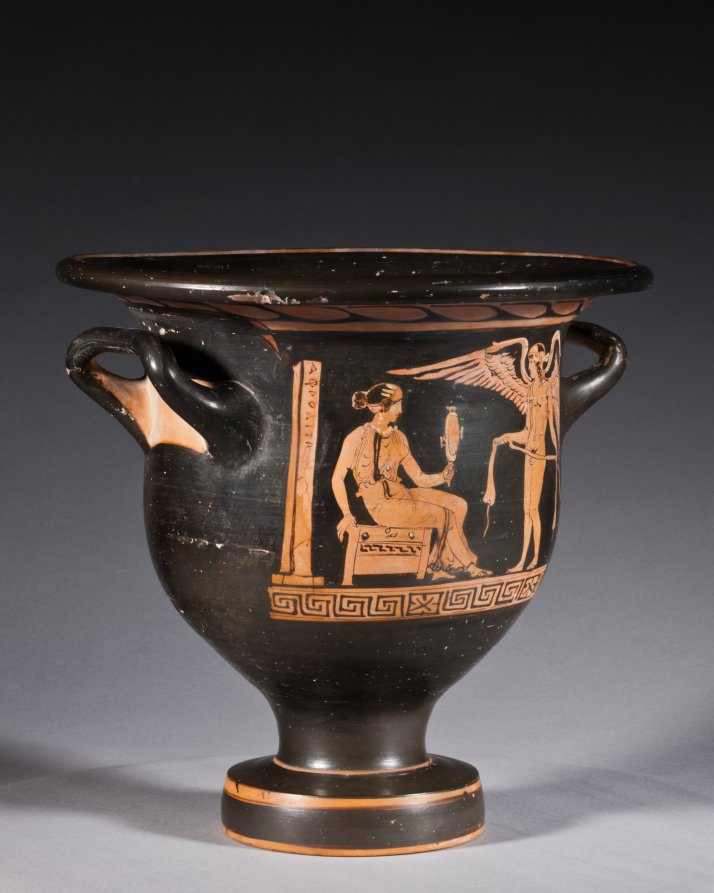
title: Red-Figure Bell Krater (Mixing Vessel): Aphrodite and Eros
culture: South Italian, Apulian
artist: attributed to Graz Painter (South Italian, Apulian, active c. 380–360 BCE)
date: c. 370–360 BCE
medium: ceramic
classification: Ceramic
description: This small mixing vessel shows a finely dressed woman seated on a chest and holding up a mirror to admire herself. Before her stands Eros, the winged god of love, holding a ribbon or sash. Behind the woman stands a pillar with the inscription ΑΦΡΟΔΙΤΗ, or APHRODITE, the goddess of love. Such labels are rare on vases, and scholars debate whether this names the woman shown as Aphrodite herself, with her son Eros, or a bride envisioning herself as Aphrodite, just before her wedding.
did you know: The dancing nude youths on the reverse are unusual; typically they would be standing and draped.